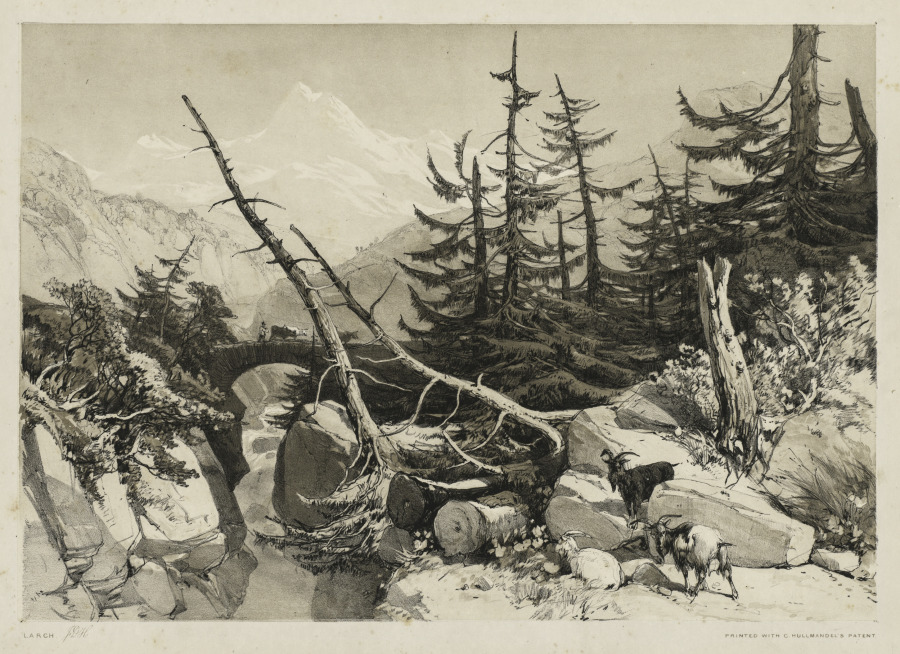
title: Pine Trees and Bridge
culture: England, 19th century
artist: James Duffield Harding (British, 1798–1863)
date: 1841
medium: lithograph with tint stone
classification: Print